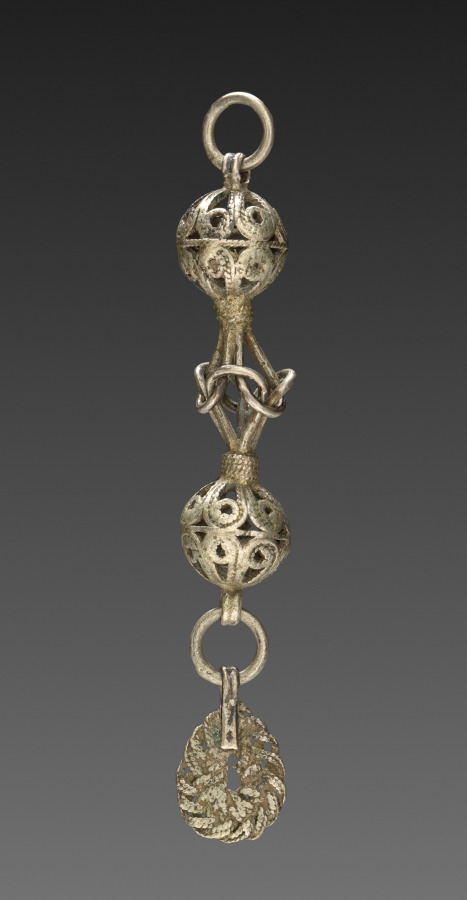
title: Button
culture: Balkans, 19th century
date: 1800s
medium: silver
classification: Jewelry